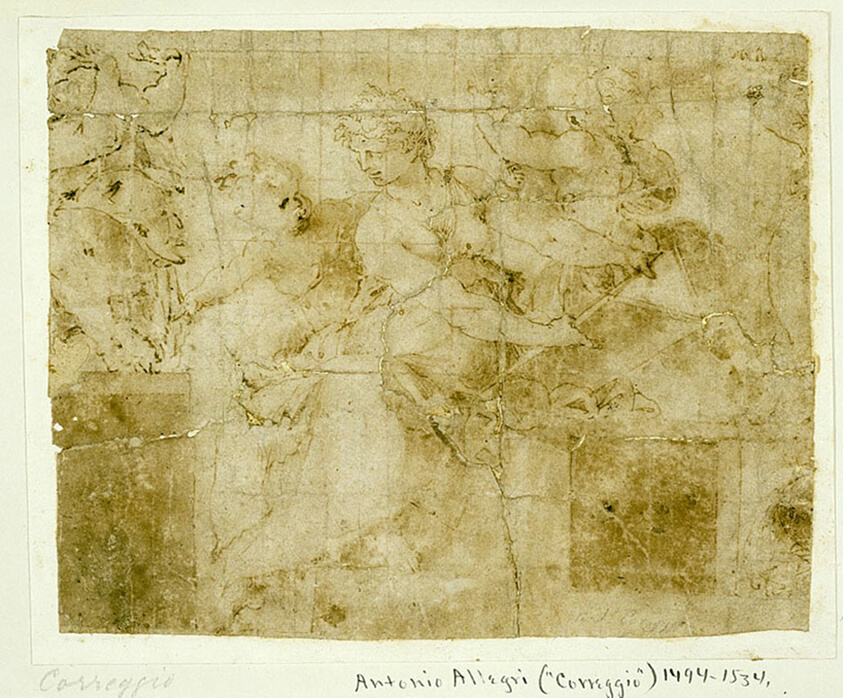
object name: Drawing and Watercolor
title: Man with Book Surrounded by Putti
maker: follower of Michelangelo Buonarroti; Italian, 1475-1564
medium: Pen and brown ink and brush and brown wash, on tan laid paper, squared in red chalk, laid down in album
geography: Italy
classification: pen and ink drawings; drawings (visual works); prints and drawing